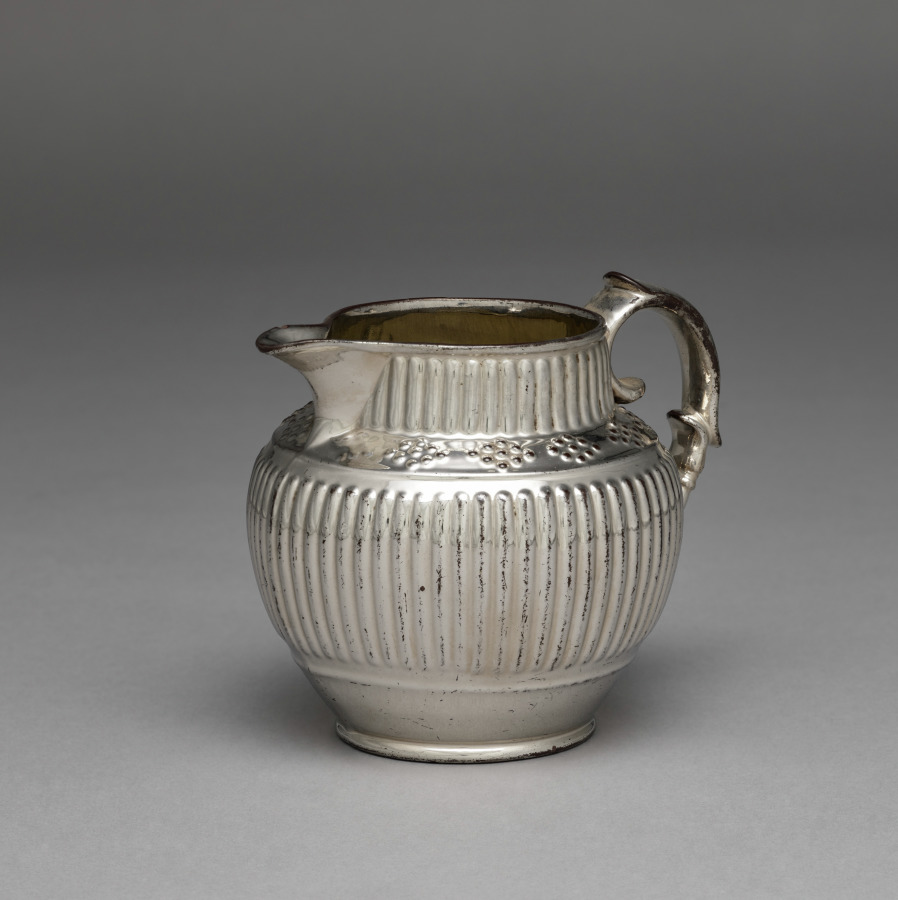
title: Jug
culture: England, Staffordshire, 19th century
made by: Staffordshire Factory (British)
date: 1800s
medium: lustreware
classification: Ceramic